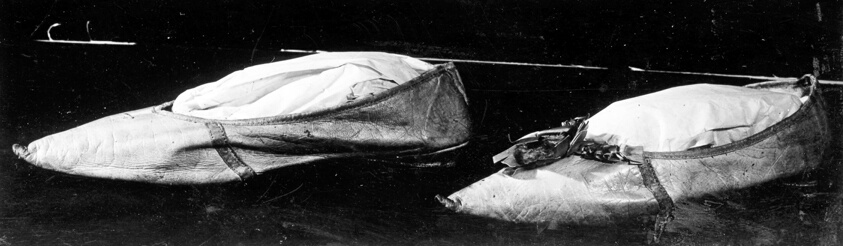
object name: Textile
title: Pair of Shoes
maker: Dixon Clement & Dixon (English, c, 1700s); England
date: c.1790s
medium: Leather and kid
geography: England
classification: textile; shoes - misc; costume accessory - shoe; costume; dress (garment); clothing